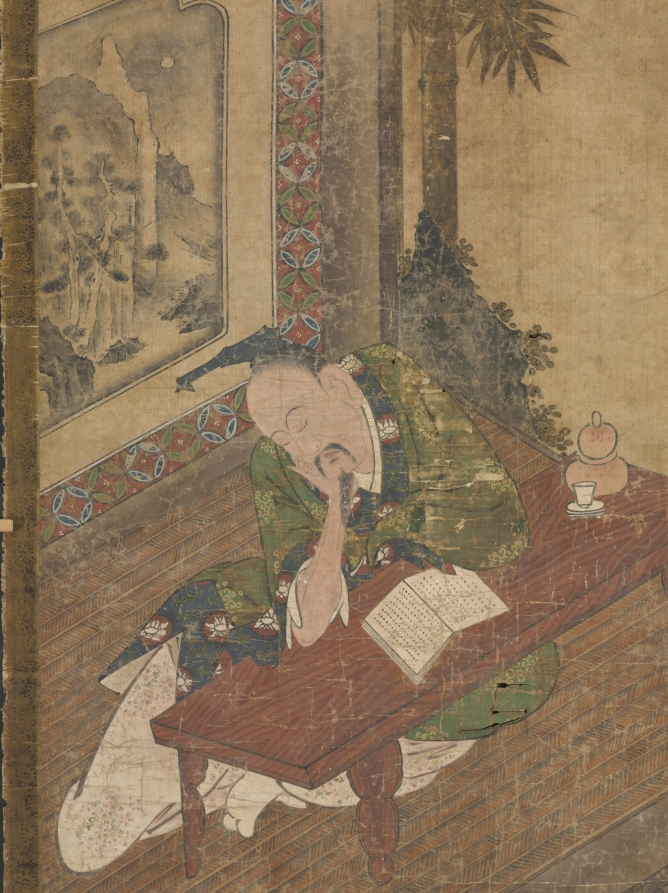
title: Sleeping Poet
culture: Japan, possibly Edo period (1615-1868)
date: c. 1700s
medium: color on silk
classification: Painting